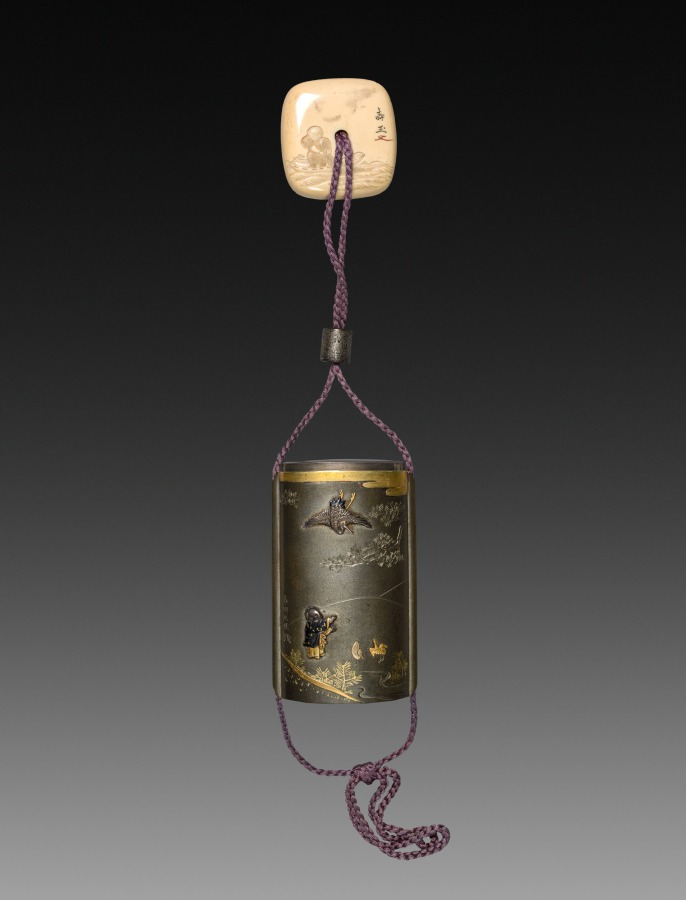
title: Inro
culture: Japan, Edo period (1615–1868)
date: early 1800s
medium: lacquer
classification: Lacquer